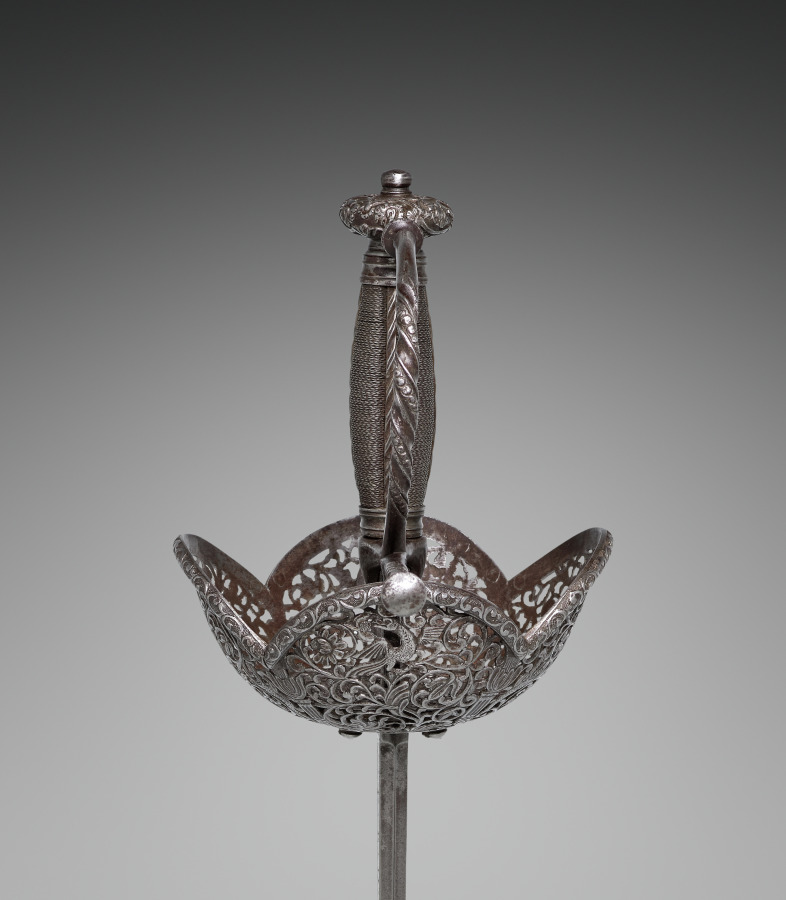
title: Cup-Hilted Rapier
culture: Spain, Toledo, 17th century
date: c. 1650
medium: Pierced and chiseled steel;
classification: Arms and Armor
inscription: PEDRO DEL MONTE/ IN TOLEDO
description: For parrying, rapiers were often made with accompanying daggers as a matched set. The aristocracy's taste for rich and intricate styles of decoration led to extravagant gilding, chiseling, piercing, enameling, and silvering. The more costly or unusual these weapons appeared, the more they were desired by the clientele who commissioned them, not only for dueling but also as the ultimate accessory.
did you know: The guard is richly decorated with chiseled and pierced arabesques, an ornamental design consisting of intertwined flowing lines.